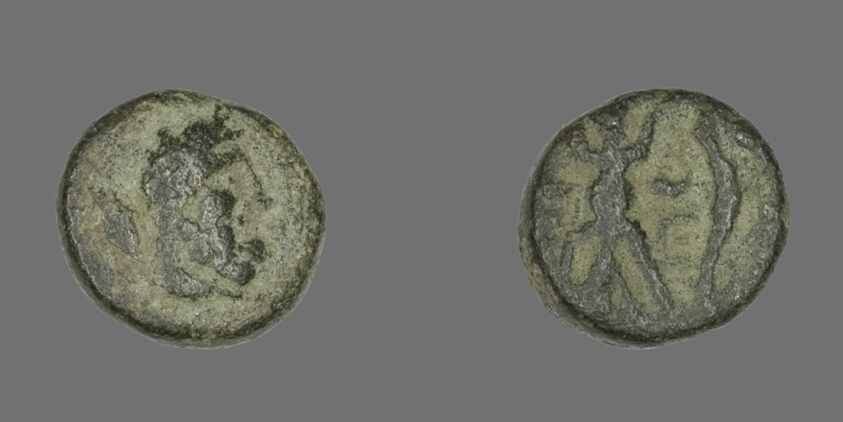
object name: Coin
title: Coin Depicting the Hero Herakles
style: greek, ancient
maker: Greek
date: 2nd-1st century BCE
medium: Bronze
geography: Ancient Greece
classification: coin; ancient art